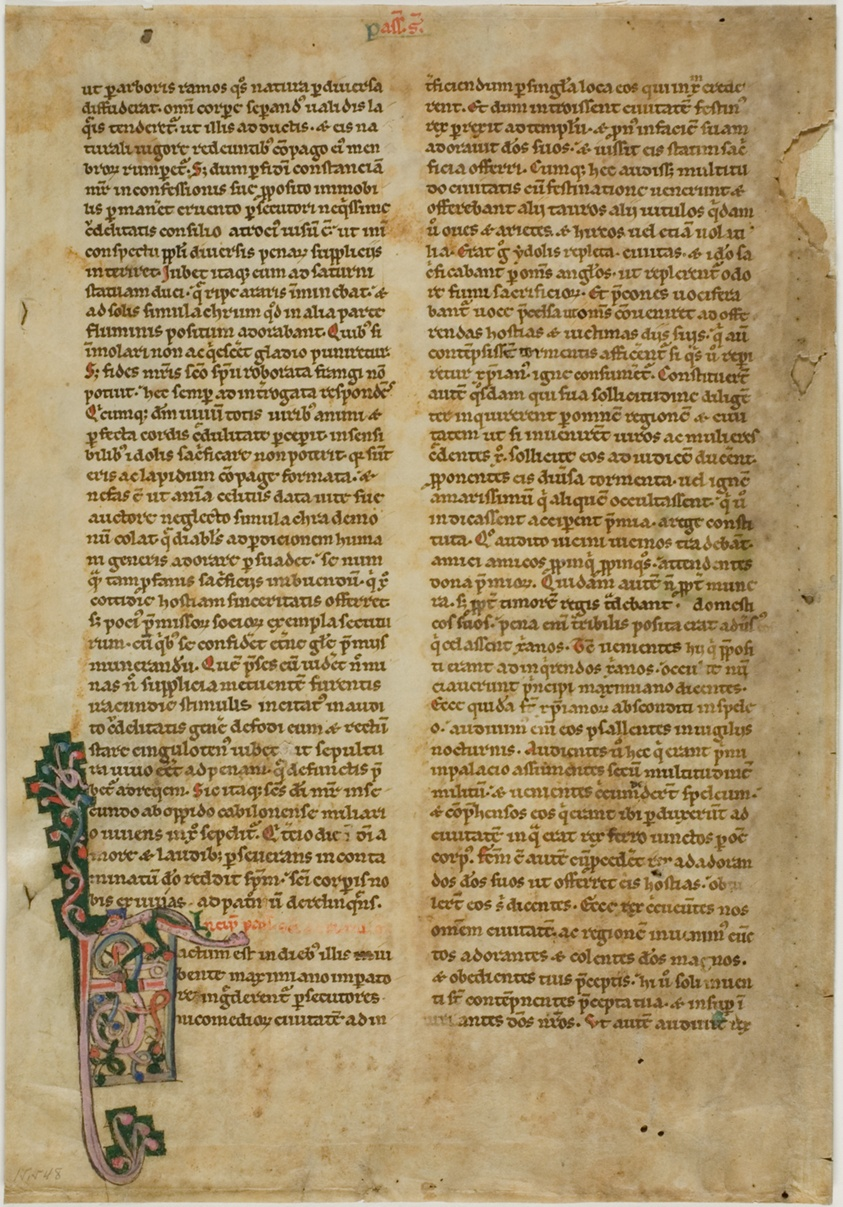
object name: Drawing and Watercolor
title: Bifolia from a Vita Sanctorum, or Lives of the Saints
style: medieval, celtic (medieval), european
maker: Italian (Tuscany)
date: c. 1150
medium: Manuscript cutting with tempera decorations and gothica textualis primitiva inscriptions in brownish-black ink, on parchment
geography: Italy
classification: tempera; manuscript; drawings (visual works); prints and drawing